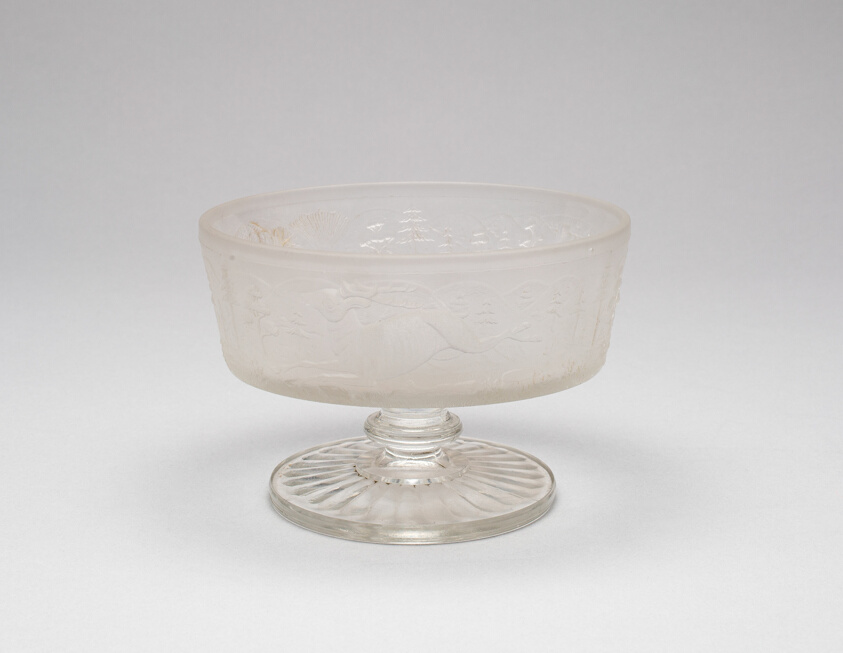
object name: Glass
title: "Westward-Ho!/Pioneer" pattern footed dish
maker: Gillinder and Sons, 1861–c. 1930; Philadelphia or Greenbsburg, Pennsylvania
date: c. 1876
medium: Glass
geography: Philadelphia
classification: dish (vessel); glass; american decorative arts; american arts; decorative arts